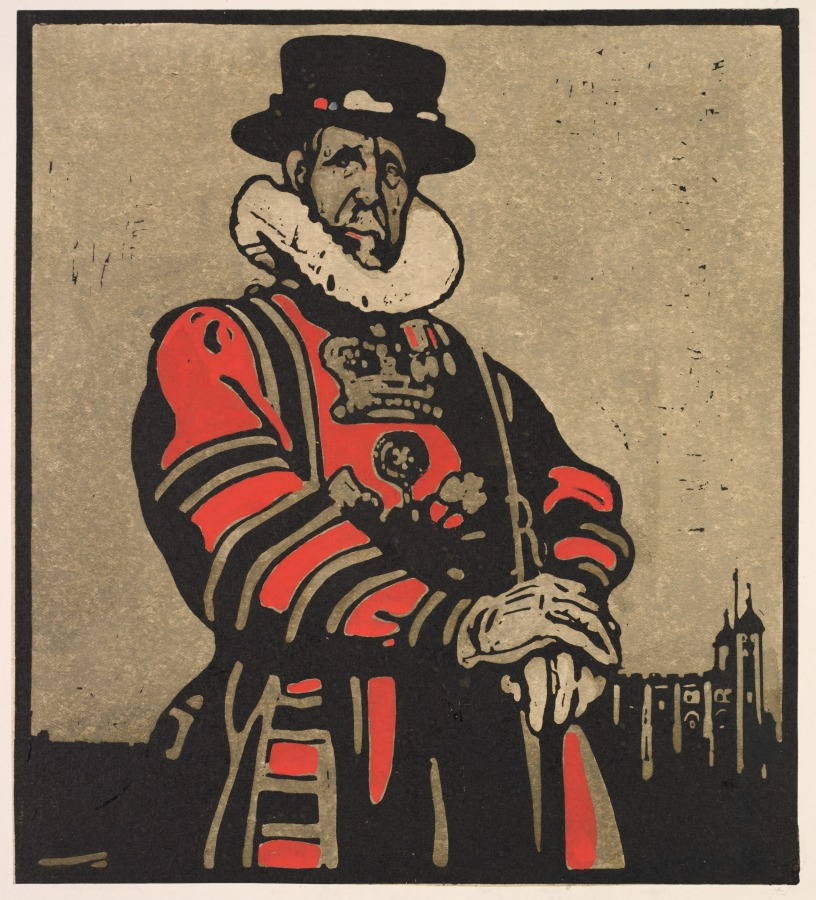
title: London Types: Beef-eater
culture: England, 19th century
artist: William Nicholson (British, 1872–1949)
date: 1898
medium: woodcut hand-colored with watercolor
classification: Print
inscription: lower left margin, in black ink: William Nicholson - 1898 -